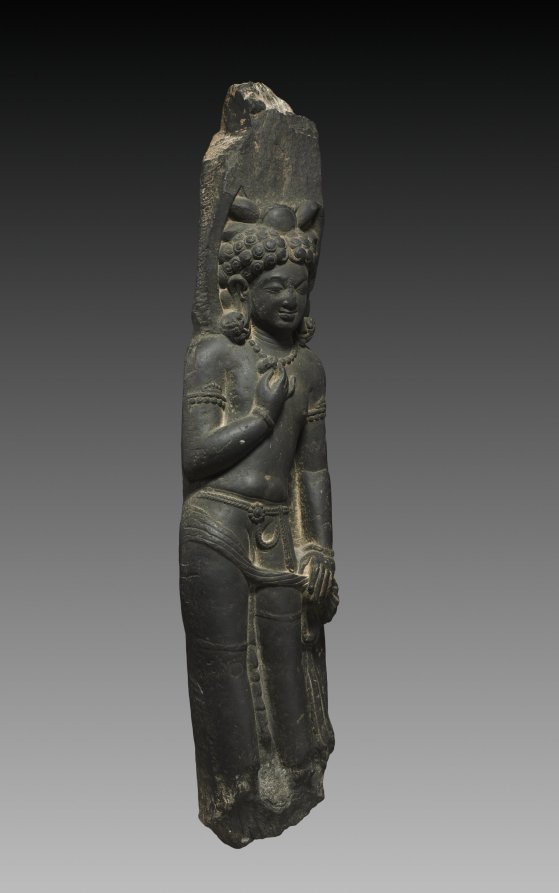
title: Personification of the Discus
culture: Northeastern India, Bihar, Aphsad, early Pala period, 7th Century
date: 670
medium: chlorite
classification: Sculpture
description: Vishnu's main weapon is the discus, or chakra in Sanskrit. Vishnu's chakra is a wheel that is a metaphor for true knowledge, which he uses in mythic battles to slice demons who stand for ignorance and self-centered arrogance. Iconic images of Vishnu show him as four-armed, with a discus in one hand; sometimes the discus is personified. This personification, with the chakra behind his head, has broken away from the main image of Vishnu. Stylistically this sculpture retains memories of the Gupta styles, with the lush ringlets of hair curling from a central part, the relatively simple adornments, and the soft contours of the body. The exaggerated facial expression and figural proportions indicate a transition to a later period.